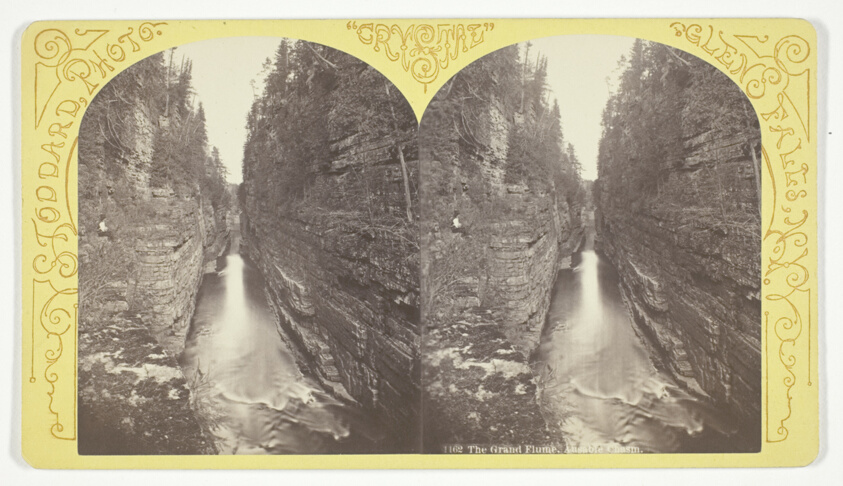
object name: Photograph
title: The Grand Flume, Ausable Chasm, No. 1162 from the series "Crystal"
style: 19th century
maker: Seneca Ray Stoddard (American, 1844-1917)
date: 1870/76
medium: Albumen print, stereo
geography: Glens Falls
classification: photography; photograph